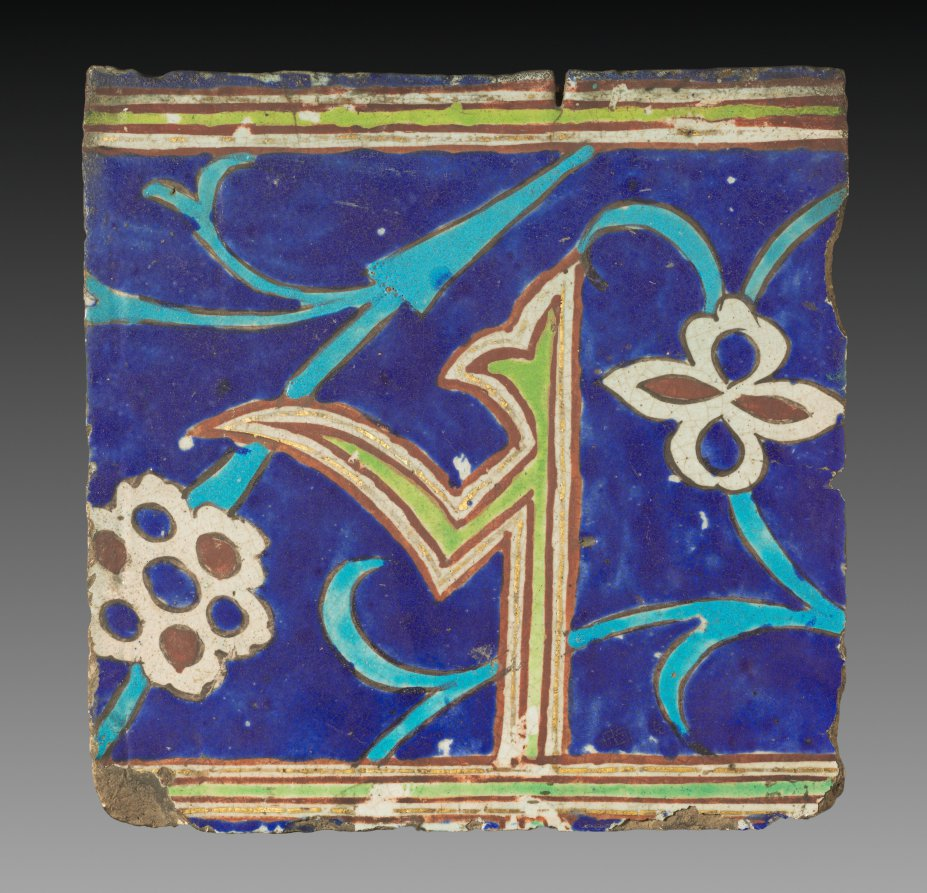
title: Wall Tile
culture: Iran, Safavid period (1501–1722)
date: 1600s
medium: faience, cuerda seca technique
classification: Ceramic